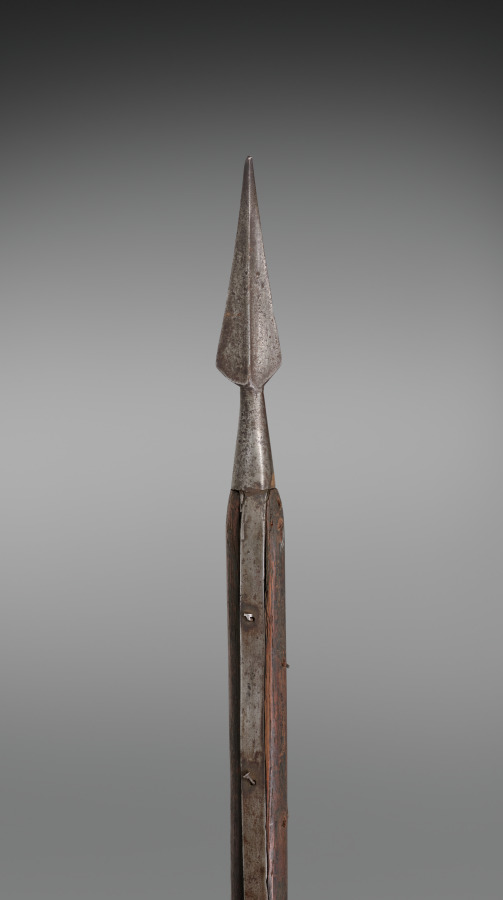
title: Banner With the Lion of St. Mark (pole)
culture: Italy, Venice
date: late 1600s - early 1700s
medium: wood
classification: Arms and Armor